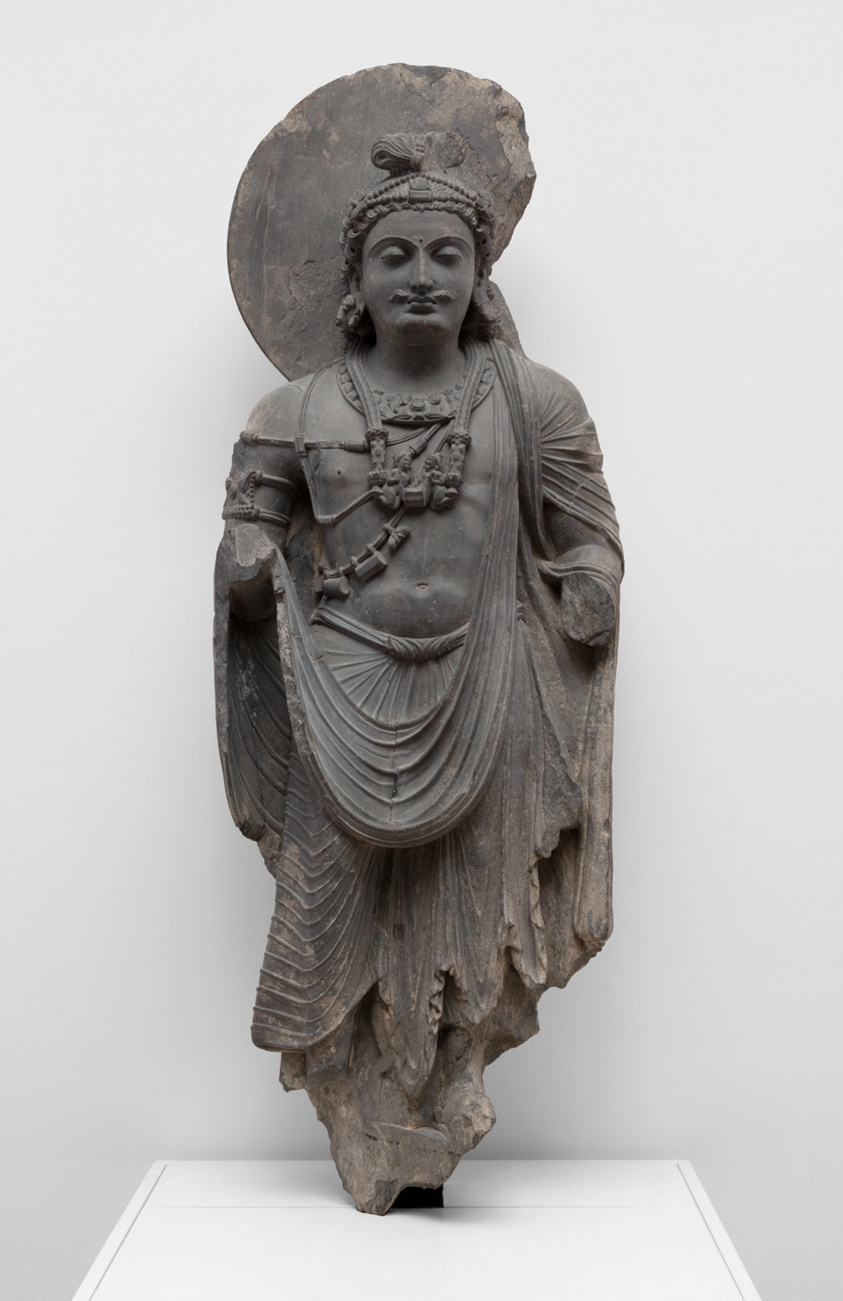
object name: Sculpture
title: Standing Bodhisattva with Human-Figure Necklace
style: South Asian, gandharan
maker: Pakistan; Ancient region of Gandhara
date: Kushan period, 2nd/3rd century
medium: Phyllite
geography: Gandhara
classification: schist; stone; sculpture; asian art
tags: religion, bodhisattva, Buddhism